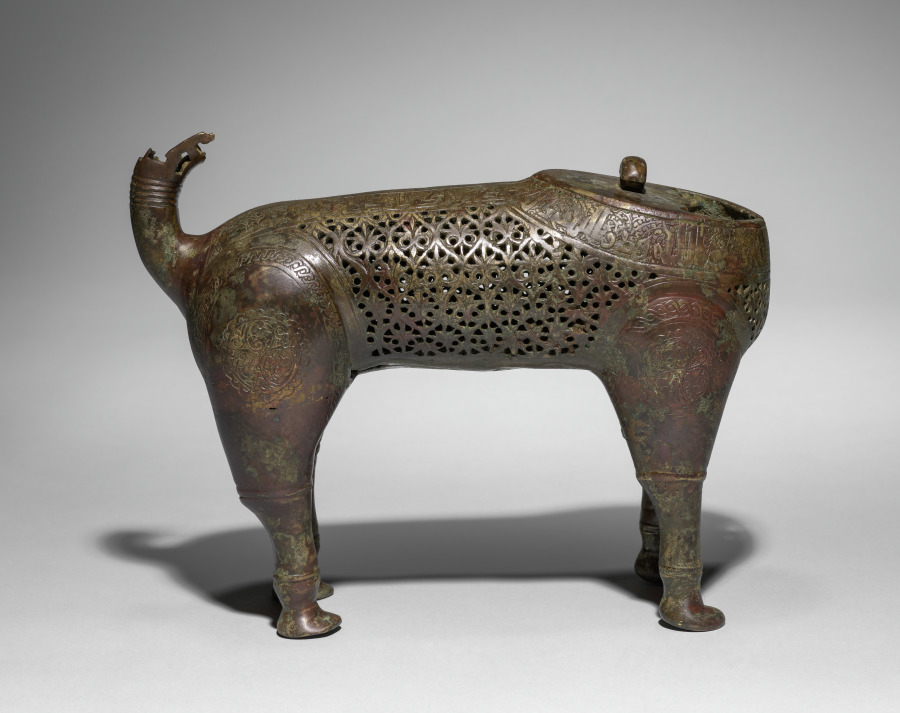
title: Feline Incense Burner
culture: Iran, Khurasan, Seljuq period of Iran (1037–1194)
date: 1150–1200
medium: Copper alloy, cast, engraved, chased, and pierced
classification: Metalwork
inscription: Qur'an sura al-jum'ah (The Friday Congregation) 62:9-10 (on neck and spine)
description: In Iran during the 1000s and 1100s, vessels in the shape of animals gained popularity, especially as incense burners. Felines were favored in Persian art and this piece may represent a caracal, a type of lynx. The head of the creature was cast separately and is removable to fill its body with hot coals and incense. Qur’anic verses on the neck and spine remind worshippers to set work aside, attend prayer, and then disperse to seek God’s bounty. The diffusion of perfumed smoke through the burner’s pierced palmette design may have served as a sensorial reminder of this teaching.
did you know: A Kufic inscription against a background of scrolling arabesques runs along the back and neck of the feline form.